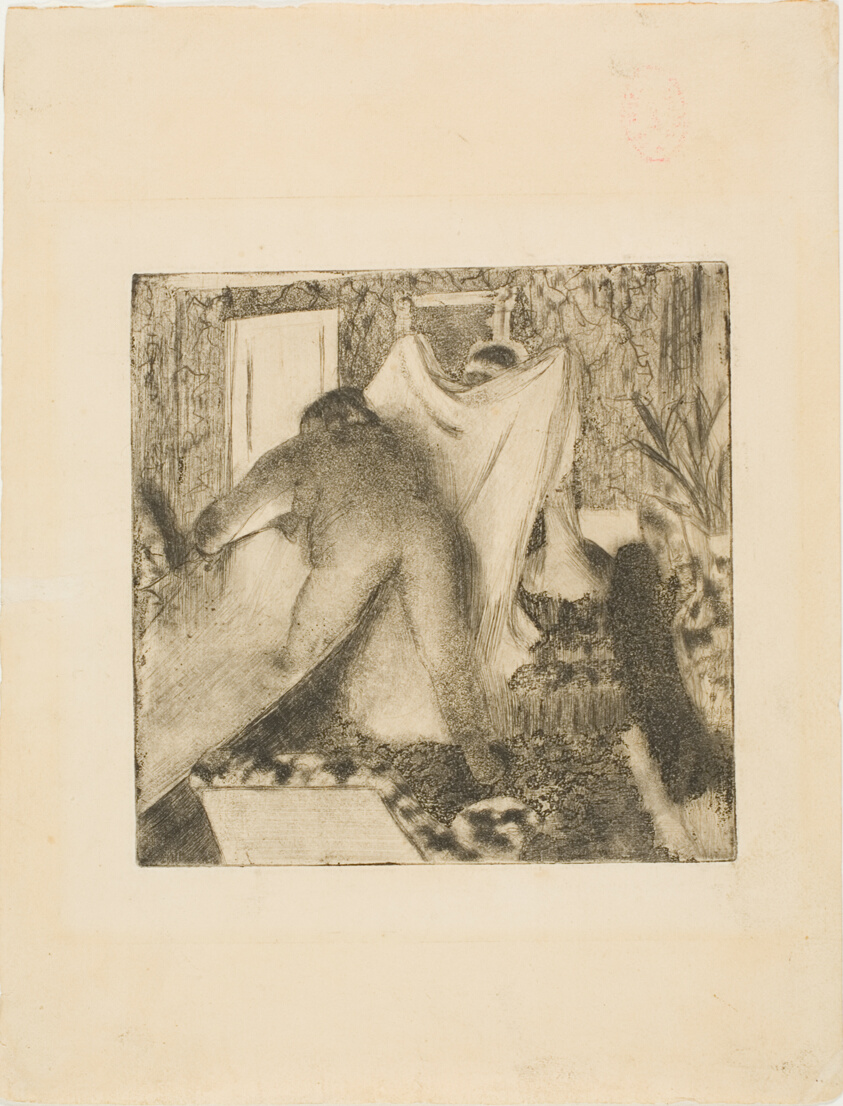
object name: Print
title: Leaving the Bath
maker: Edgar Degas; French, 1834-1917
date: 1879–80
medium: Drypoint and aquatint in black on tan wove paper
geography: France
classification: drypoint; print; prints and drawing; paper